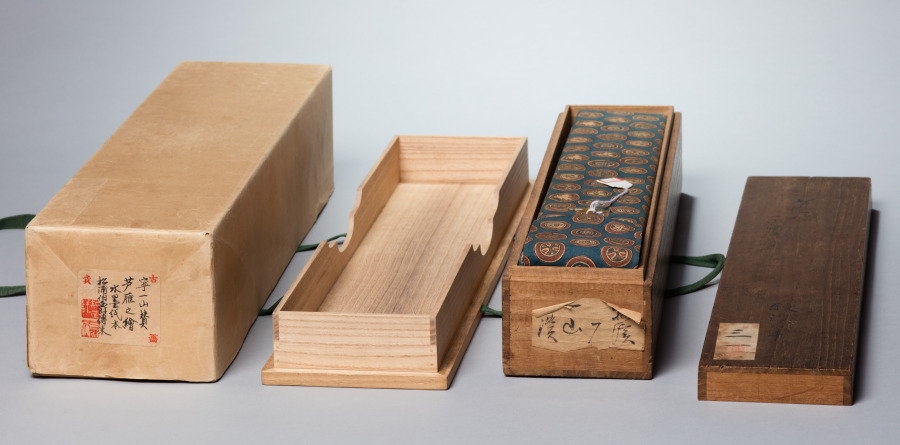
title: Reeds and Geese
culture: Japan, Kamakura period (1185–1333)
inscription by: Yishan Yining [Issan Ichinei] (Chinese, 1247–1317)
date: 1314–17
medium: hanging scroll; ink on paper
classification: Painting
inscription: signed: Issan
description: Reeds and geese has been a common pairing in Chinese literary and visual culture for many centuries. This painting presents the contribution of a Japanese amateur painter, almost certainly a Zen Buddhist monk, to Japan’s fledgling efforts to add the theme to its own cultural vocabulary in the early 1300s. As was customary at the time in Japan, the painter did not sign or seal his work; the inscription, a poem added to the painting by the eminent émigré monk Yishan Yining, along with his signature and seal, was of far greater cultural value. Today, the modestly sized painting has tremendous significance as one of the earliest surviving examples of Japanese ink paintings with reeds and geese.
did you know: Tokyo National Museum owns a copy of this painting made by Kano Gyokusen (1796–1864) when he was 14 years old.